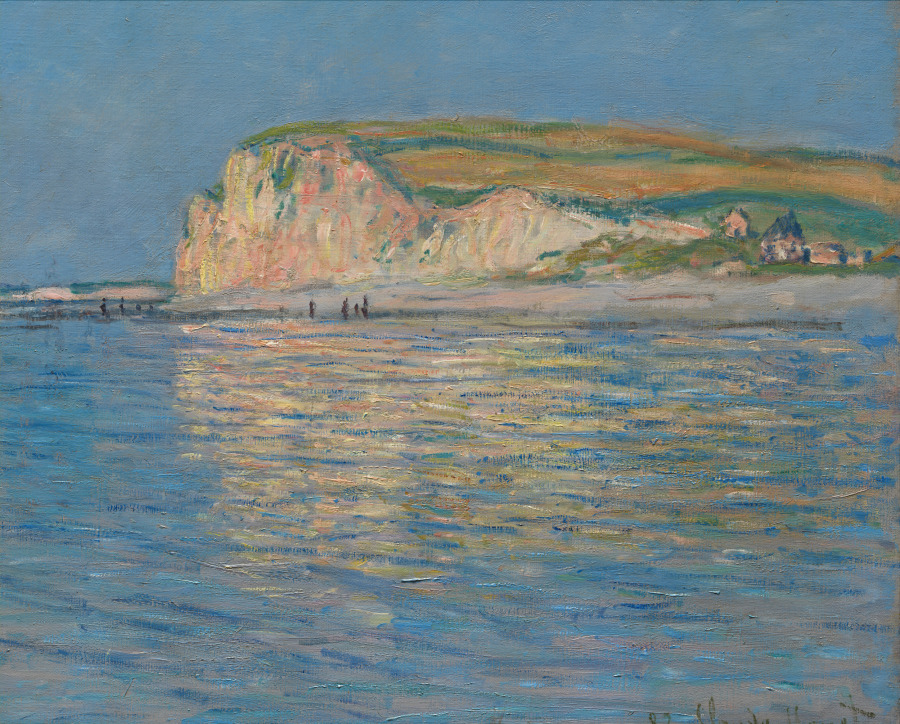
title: Low Tide at Pourville, near Dieppe, 1882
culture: France, 19th century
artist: Claude Monet (French, 1840–1926)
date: 1882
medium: oil on fabric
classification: Painting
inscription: Signed lower right: 82 Claude Monet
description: This is one of several views Claude Monet painted of Pourville, a fishing village on the north coast of France in Normandy. Pourville featured a boardwalk, a broad beach, and stunning cliffs. According to the artist's correspondence, the village was nothing special, but he was inspired by the landscape: "One could not be any closer to the sea than I am, on the pebbled beach itself and the waves beat at the foot of the house." During the spring of 1882 in Pourville, Monet stayed in a small hotel similar to the dwellings seen at the foot of the cliff to the right in this painting.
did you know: The narrow strokes of black paint along the the edge of the water at the base of the cliff indicate bathers.